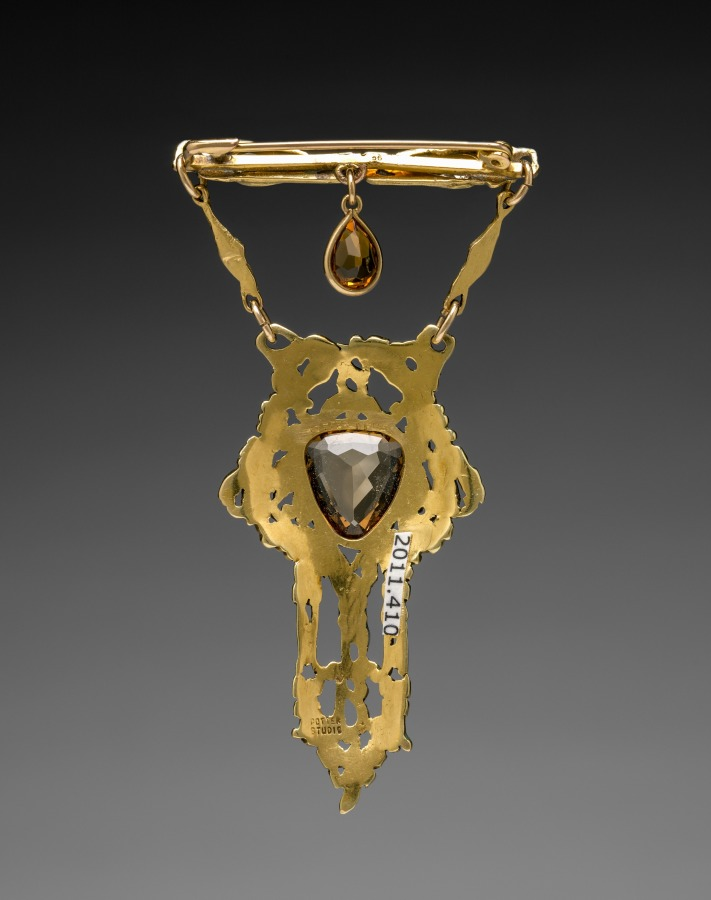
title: Pendant Brooch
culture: America, Ohio, Cleveland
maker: Potter Studios (American)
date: c. 1905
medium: enamel, gold, citrines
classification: Jewelry